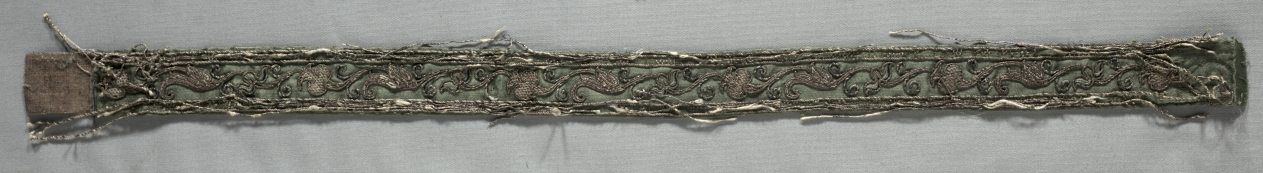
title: Apparel from a Dalmatic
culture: Italy, early 16th century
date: early 1500s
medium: embroidery; silk and metallic threads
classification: Embroidery